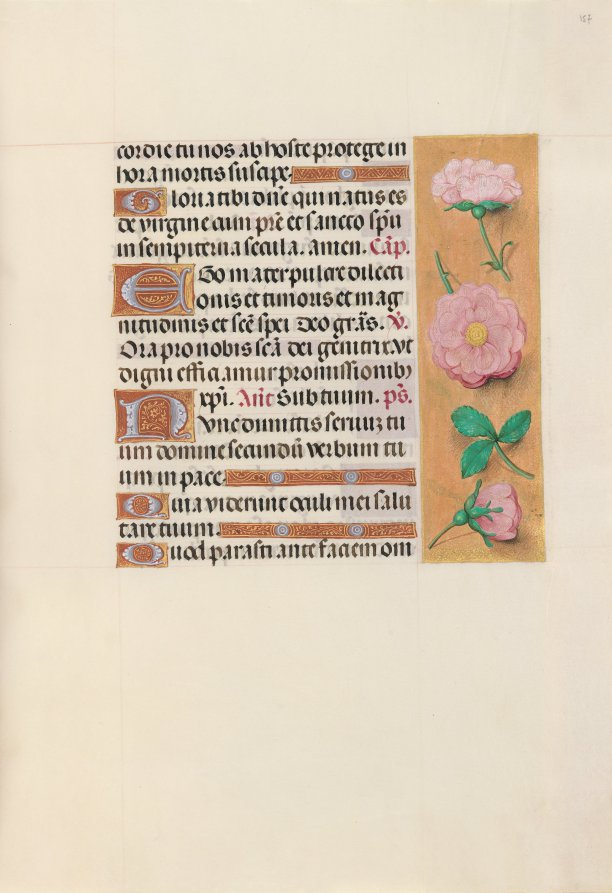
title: Hours of Queen Isabella the Catholic, Queen of Spain: Fol. 157r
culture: Flanders, Ghent and Bruges, late 15th century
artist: Master of the First Prayerbook of Maximillian (Flemish, c. 1444–1519)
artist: and Associates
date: c. 1500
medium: ink, tempera, and gold on vellum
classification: Bound Volume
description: This manuscript was illuminated by a circle of at least five highly organized manuscript painters active in the Flemish cities of Ghent and Bruges. The principal illuminator was Alexander Bening, who painted the majority of the book's miniatures. Manuscripts produced by this circle of artists are renowned for the decoration of their borders, which typically feature a rich variety of realistically-painted flowers, birds, and butterflies. This prayer book, called a book of hours, was intended not for a cleric, but for the private devotions of a lay person-in this case, Isabella the Catholic, Queen of Spain (1451-1504). Isabella's coat of arms embellishes the book's frontispiece. It is unlikely that the book was commissioned by the Queen herself; rather, she probably received it as a diplomatic gift from someone courting her patronage, perhaps Cardinal Francisco Jimenez de Cisneros. A Franciscan friar, Jimenez was dependent upon Isabella for his advancement, first to the post of Queen's confessor in 1492, and then to Archbishop of Toledo in 1495.